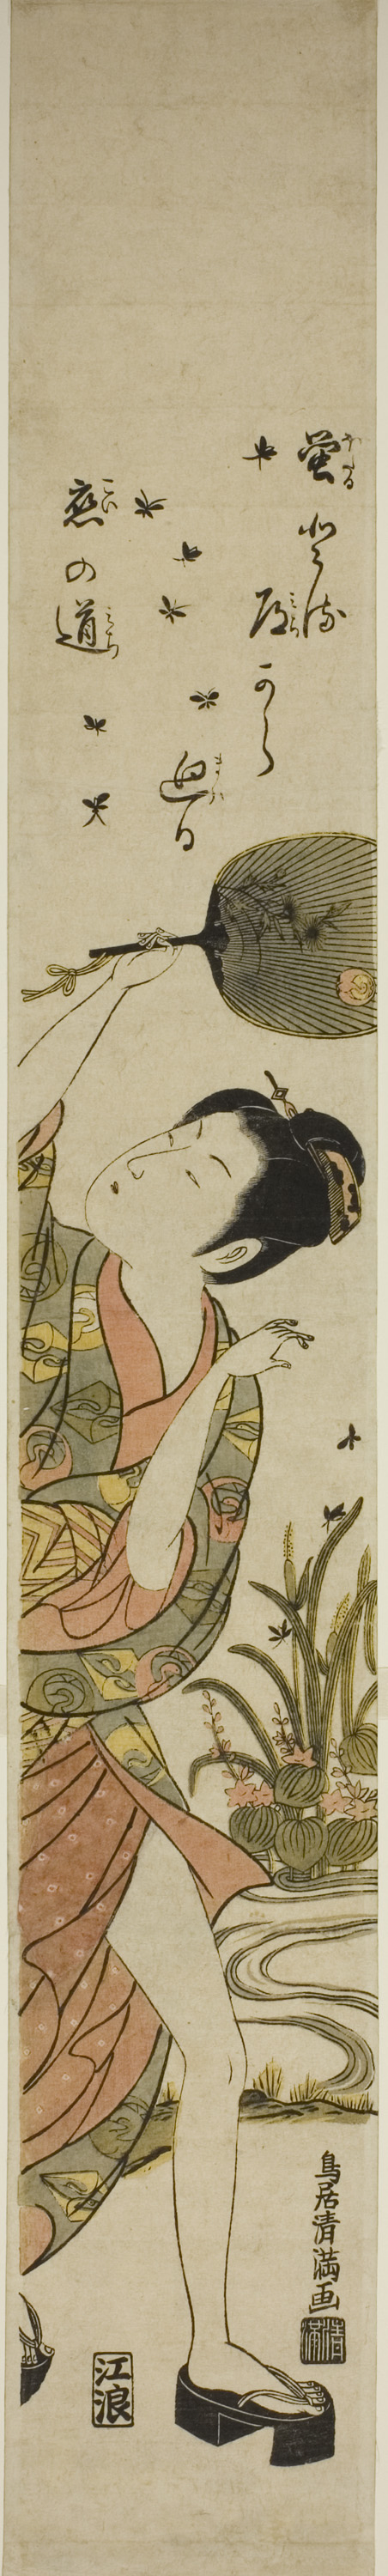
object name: Print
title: Chasing Fireflies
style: Japanese (culture or style)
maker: Torii Kiyomitsu I (Japanese, 1735-1785)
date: c. 1760/64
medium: Color woodblock print; hashira-e, benizuri-e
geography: Japan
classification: woodblock print; print; asian art